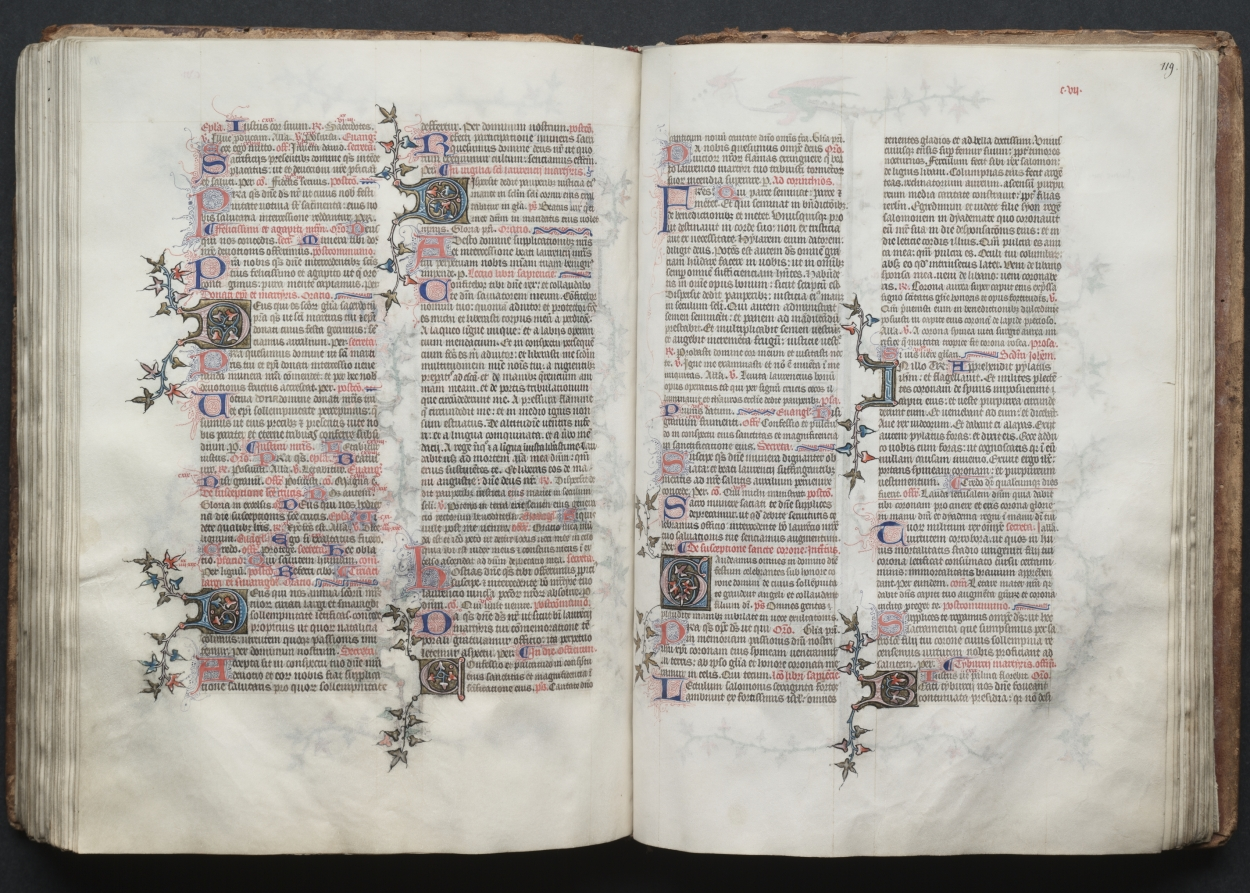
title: The Gotha Missal: Fol. 118v, Text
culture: France, Paris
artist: Master of the Boqueteaux (French)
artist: and Workshop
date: c. 1375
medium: ink, tempera, and gold on vellum; blind-tooled leather binding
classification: Bound Volume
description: The style and quality of this manuscript's decoration is typical of deluxe Parisian books made for aristocratic or royal patrons. Most of the book's decoration appears to be the work of the Master of the Boqueteaux, an artist active at the court of King Charles V (died 1380). His style was apparently shared by a number of book illuminators working in and around Paris. It is very possible that the Gotha Missal belonged to Charles V, but is not provable because the manuscript has no royal portraits and lacks a colophon. Given the book's magnificent decoration, however, it would seem that it was produced for a Valois prince, if not for the king himself. The manuscript receives its name from the German dukes of Gotha, its later owners.